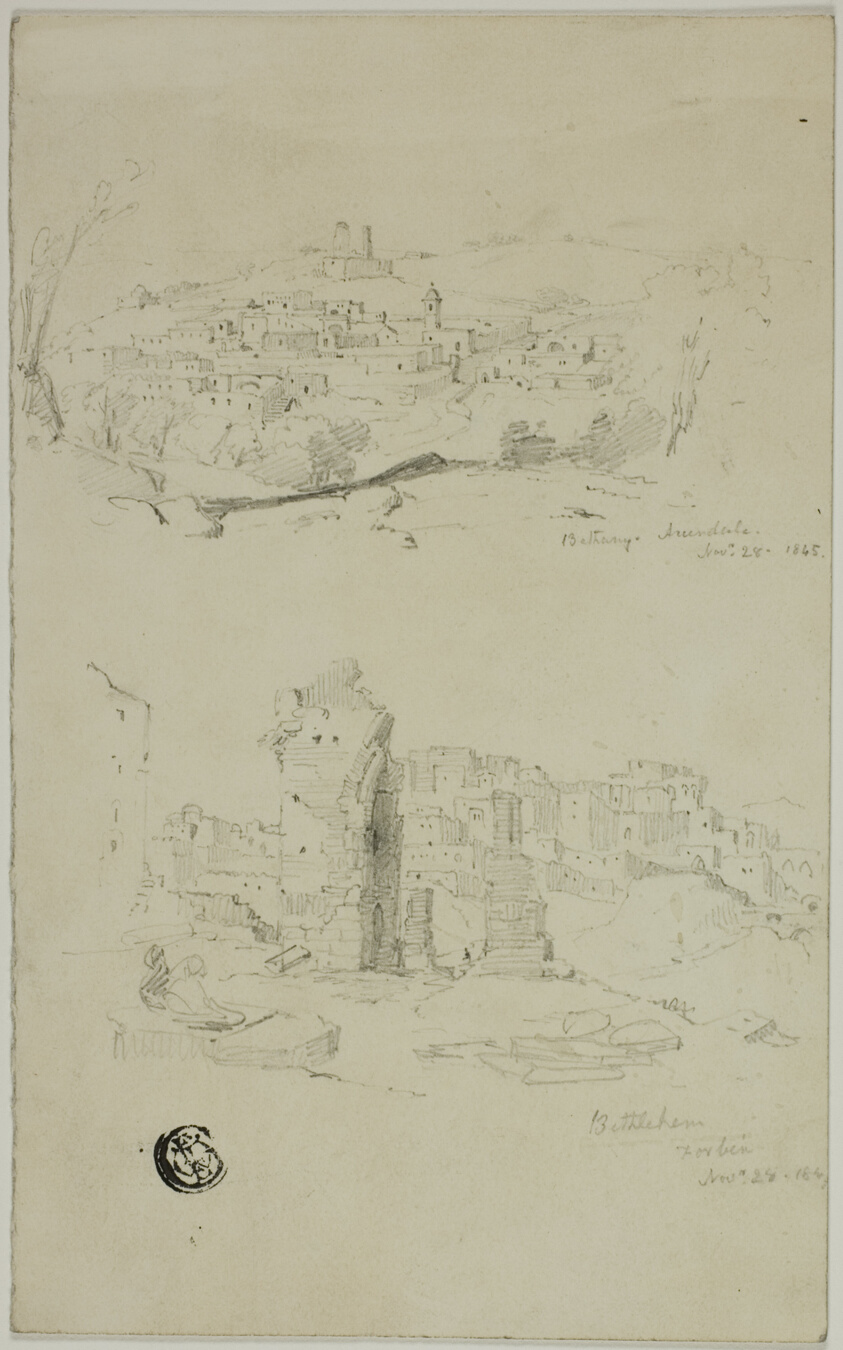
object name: Drawing and Watercolor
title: Views of Bethany and Bethlehem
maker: After Francis Vyvan Jago Arundale (English, 1807-1853); or after Comte de Louis-Nicholas-Philippe-Auguste Forbin (French, 1777-1841)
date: 19th century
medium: Graphite on cream wove card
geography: United Kingdom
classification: graphite; drawings (visual works); prints and drawing